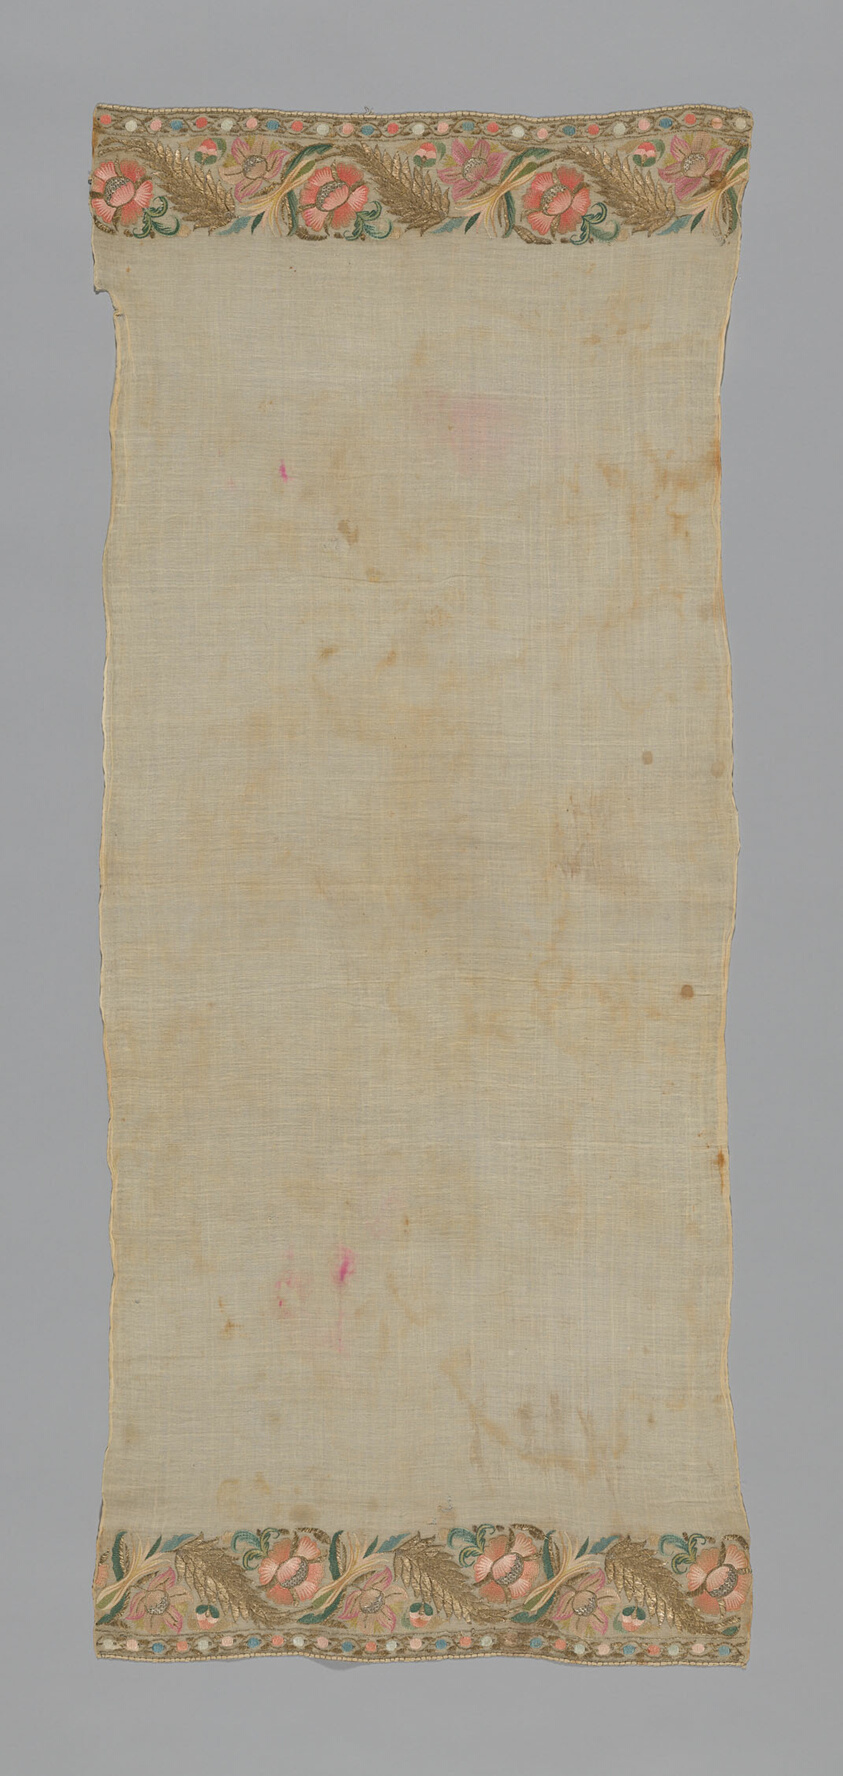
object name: Textile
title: Towel or Napkin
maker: Turkey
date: 19th century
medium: Towel, embroidered in design of flowers and leaves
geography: Turkey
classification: textile; weaving; needlework (visual works)